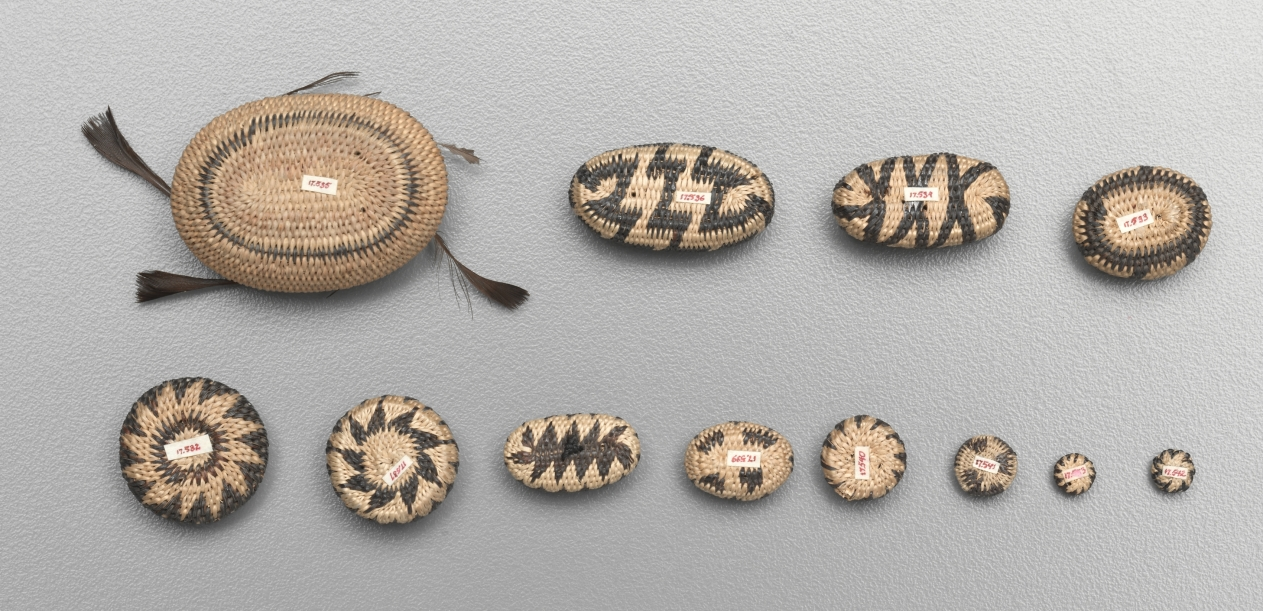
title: Miniature Round Basket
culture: California, Pomo, late 19th-early 20th century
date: late 1800s-early 1900s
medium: plant materials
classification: Basketry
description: Miniature baskets were made to demonstrate the basket-maker’s virtuoso skill, and these tiny marvels seem to be no exception—the smallest are just a few millimeters wide but still patterned. For such fine work, dexterity was required as much for preparation of materials as for weaving.